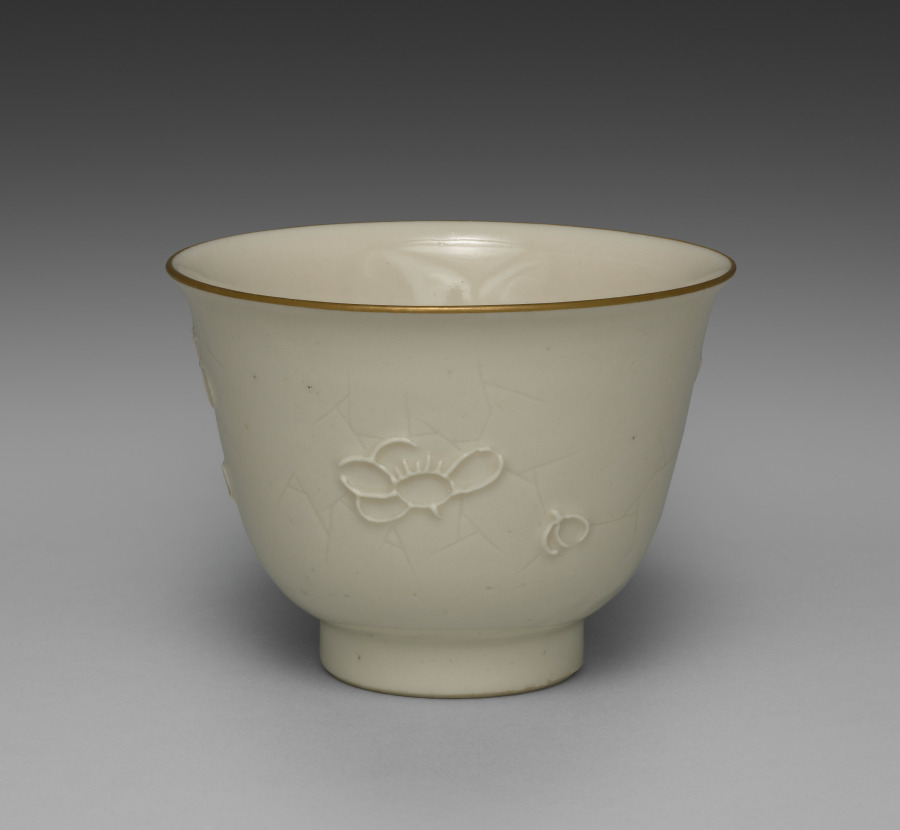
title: Drinking Cup from Dining Set with Plum Blossoms and Cracked-Ice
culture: Japan, Meiji period (1868–1912)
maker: Seifū Yohei II (Japanese, 1844–1878)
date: c. 1875–78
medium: Porcelain with molded designs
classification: Ceramic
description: Each item in this set has a delicate low-relief design of flowering plum branches over scattered, intersecting lines meant to resemble the cracked-ice surface of a frozen body of water and is signed on the base in gold pigment. While Yohei II produced many fine works in underglaze blue, like those produced by Kiyomizu Shichibei, he also made works in quite different styles later in his career, from the early 1870 s. In 1873, he was appointed purveyor to the Industrial Center of Kyoto Prefecture, a designation associated with Kyoto’s efforts to reach an international market through the port of Kobe; and from 1875 until his death, he was involved in national-level projects to present Japanese ceramics across the world. It was during this period that Yohei III was apprenticed to Yohei II, and it has been suggested that this set may in fact be an early example of Yohei III’s work, which he signed with his teacher’s name. Decorated with flowers resembling Japanese textile motifs, the set calls to mind the design of Yohei II’s pair of vases with plum blossoms in the Victoria and Albert Museum. Here, the elaborate trees created for a formal public exhibition setting have been translated into the approachable blossoms of the genteel domestic environment. While the designs are consistent across the pieces, each raised flower petal and pistil and each incised line in the ice was done by hand, so the cups, bowls, and dishes are similar yet unique. The bottoms of two boxes once identified the set’s owner, but the information has been deliberately obscured with black ink. However, inscriptions still visible appear to indicate two occasions, once at the end of July 1886 , and once again in June 1916 , when parts of the set were requested from Hokura in Niigata Prefecture. The location corresponds to a neighborhood in the present-day city of Jōetsu. The surname Tsuji 辻 also appears on a paper tag affixed to one of the box cloths. Future research may possibly reveal more about their provenance. A vase by Yohei III in a private collection combines the formal grandeur of the Yohei II vases in the Victoria and Albert Museum with the gentler design of this dining set, placing flowering plum trees against soft, scalloped-edge clouds resembling those in golden screens.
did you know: The dining wares have a creamy white coloration that the four boxes containing them identify as Korean in style.